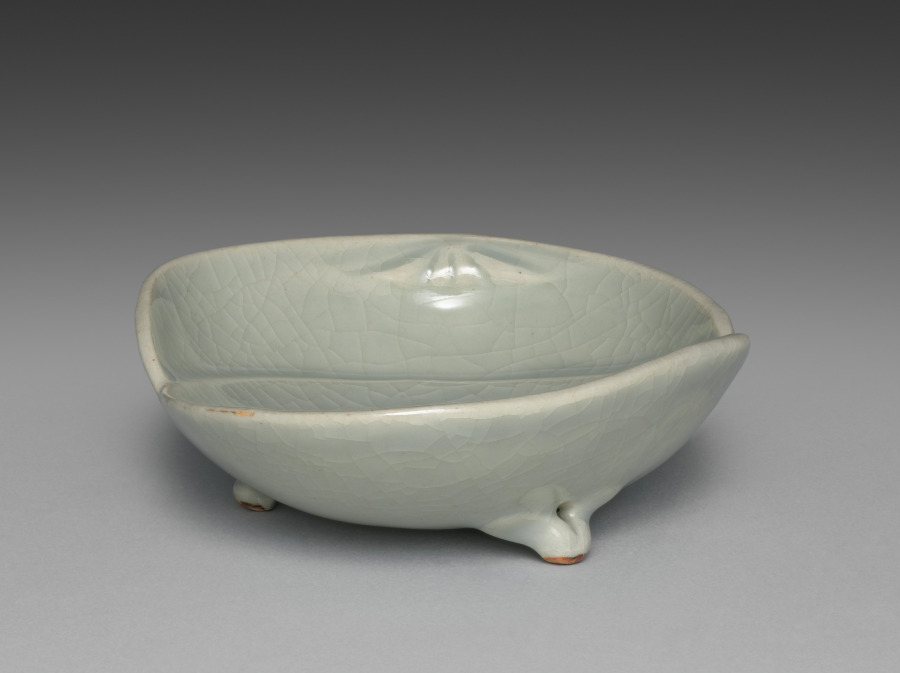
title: Dish from Dishes with Matching Shells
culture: Japan, Meiji period (1868–1912)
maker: Seifū Yohei III (Japanese, 1851–1914)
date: 1893–1914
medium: One of a pair of dishes; porcelain with celadon glaze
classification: Ceramic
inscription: 清風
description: Yohei III’s main output for his sophisticated clientele was in the form of tea sets and dining sets. He created a range of dishes in green glazes. He often produced in pairs, sets of five, or sets of ten. This pair of shell dishes have a box lid interior attestation by Yohei IV that the dishes were made by Yohei III with a cracked-ice (hyōretsu) pattern in the glaze, omitting reference to any glaze coloration.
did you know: These shell-shaped dishes are of the saucer type, suitable for dipping sauces.